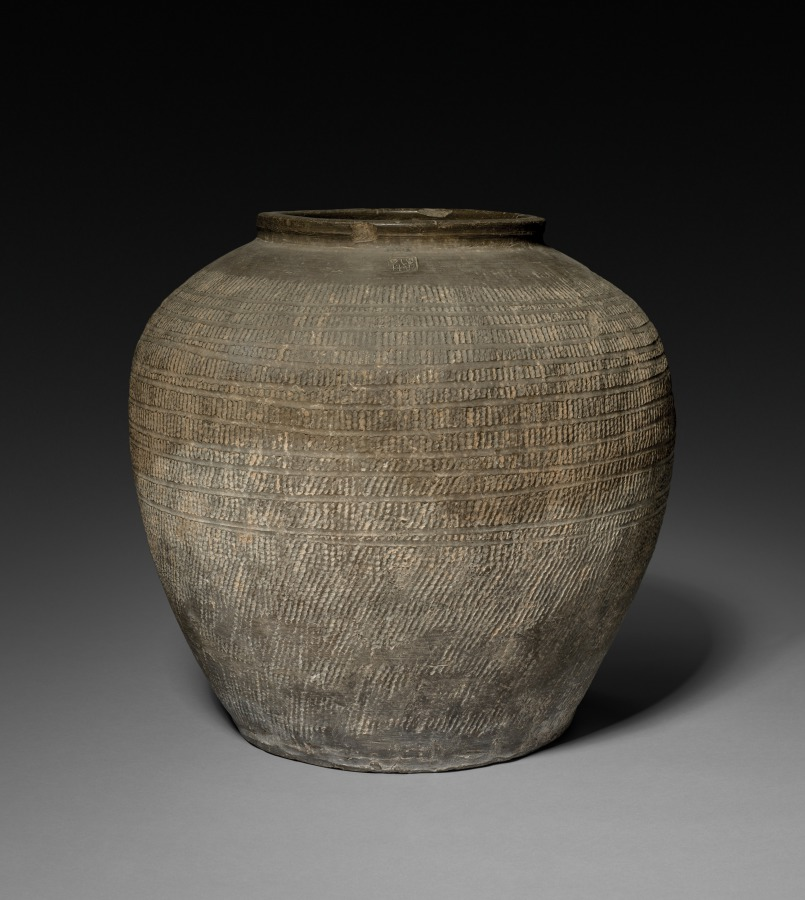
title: Jar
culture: China, Hunan province, reportedly Changsha, Eastern Zhou dynasty (770–256 BCE), Warring States period (475–221 BCE)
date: 481–221 BCE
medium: earthenware with impressed and incised decoration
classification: Ceramic